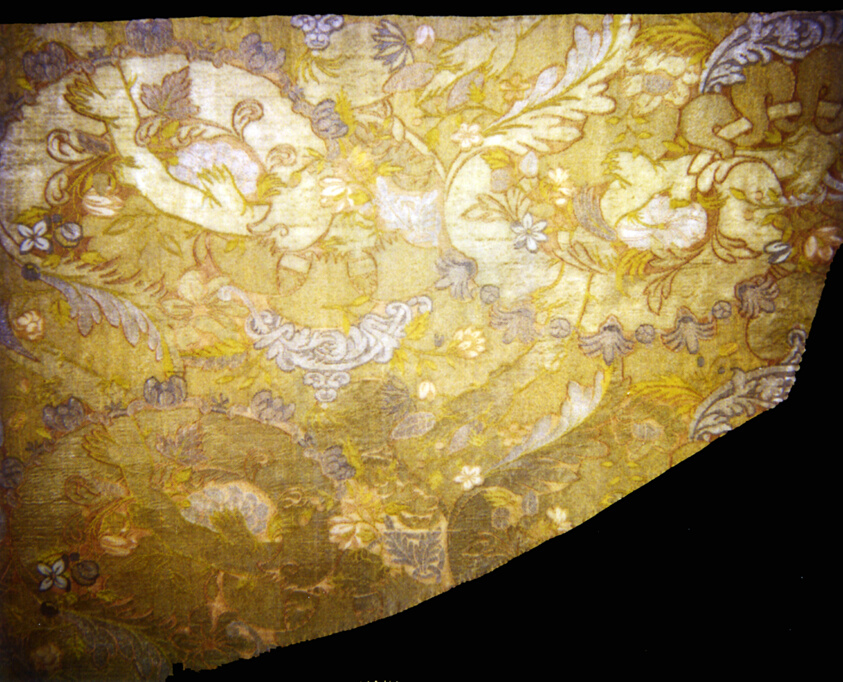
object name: Textile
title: Panel from a Cope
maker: Italy, Venice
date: 1708/10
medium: Silk and gilt and-silvered-metal-strip-wrapped silk, warp-float faced 7:1 satin weave with weft-float faced 1:3 and 2:2 'S' twill interlacings of secondary binding warps, supplementary brocading wefts and self-patterning ground wefts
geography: Venice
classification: textile; weaving; liturgical